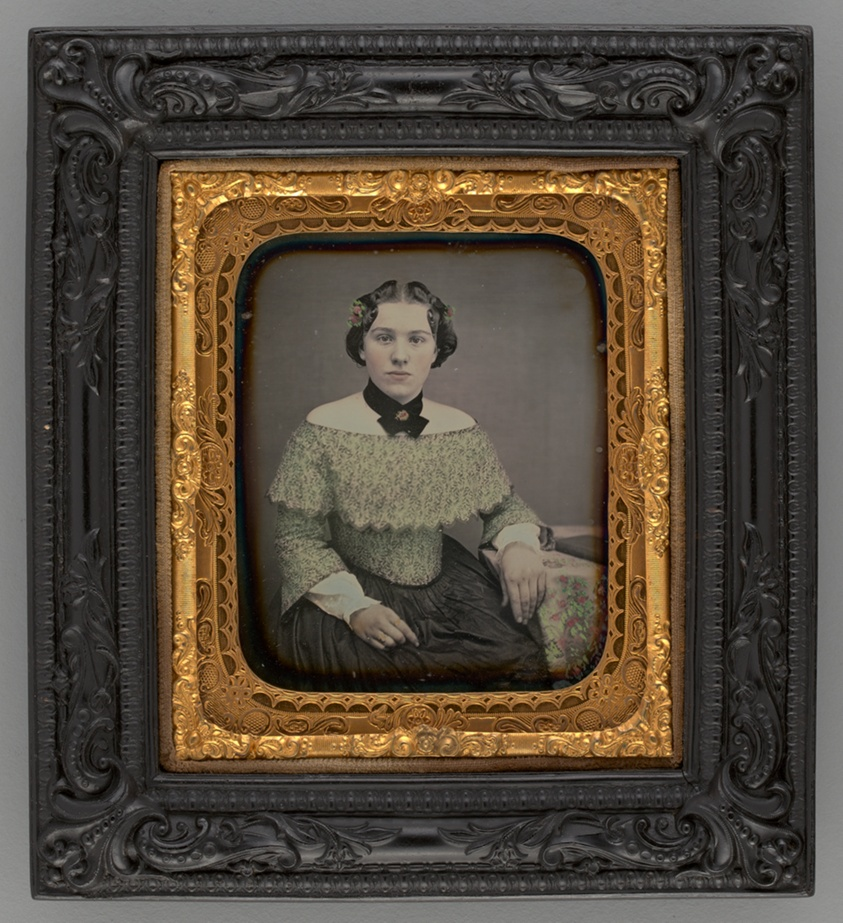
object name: Photograph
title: Untitled (Portrait of a Seated Woman)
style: 19th century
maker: Unknown maker; American, 19th century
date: 1860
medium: Daguerreotype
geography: United States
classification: portrait; photograph; photographic process; photography; portrait; daguerreotype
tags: lundberg collection, portraits, portraits: female subject